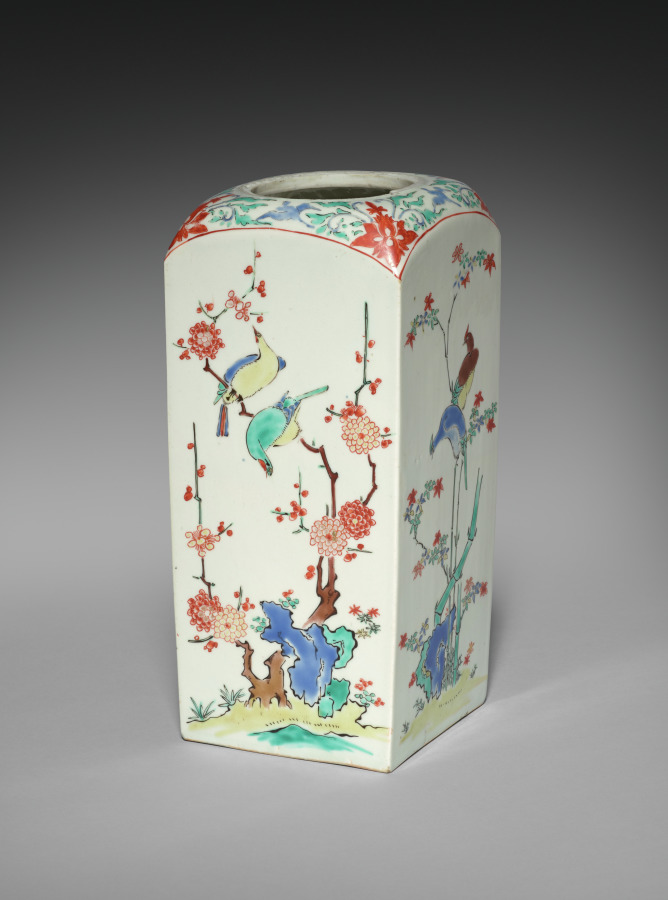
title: Square Jar with Birds and Flowers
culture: Japan, Edo period (1615–1868)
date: late 1600s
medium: Porcelain with overglaze color enamels and gold (Hizen ware, Kakiemon type)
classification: Ceramic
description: This lidded square jar was likely paired with a complementary yet nonidentical mate. The pine tree, plum, and bamboo together form the frequently depicted motif known as the Three Friends of Winter (shōchikubai), so named because of their hardy perseverance in the cold. Each side also features a pair of birds, including cranes on one face and pheasants on another.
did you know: A jar like this was fired at a high temperature, painted with colored enamels, and then fired again at a lower temperature.